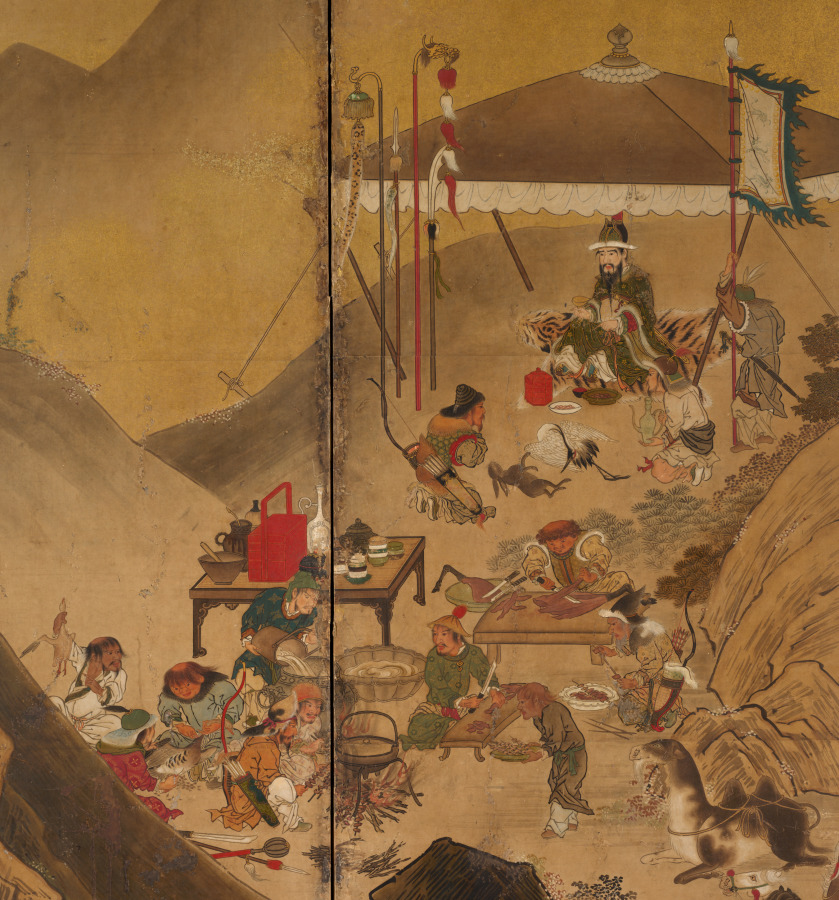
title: Tartars Hunting in a Mountain Landscape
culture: Japan, Edo period (1615–1868)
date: first half of 1600s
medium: six-panel folding screen; ink, color, and gold on paper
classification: Painting